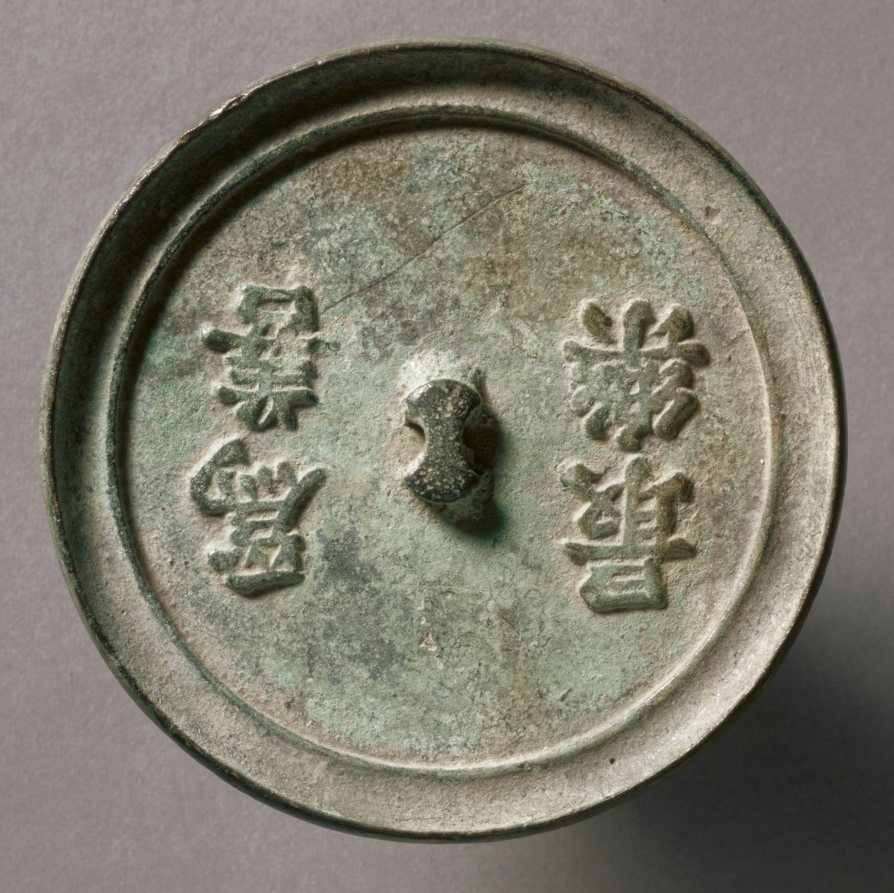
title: Mirror with Confucian Maxim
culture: China, Ming dynasty (1368–1644)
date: 1400s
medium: bronze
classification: Metalwork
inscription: 為善最樂